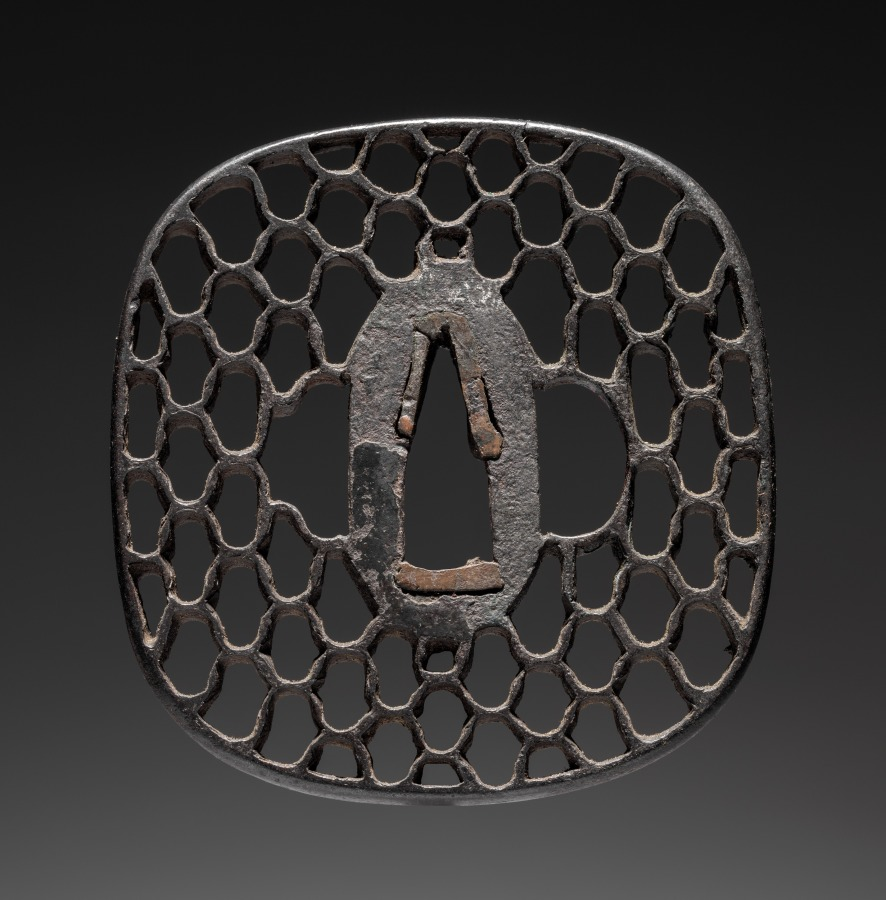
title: Sword Guard (Tsuba)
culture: Japan, possibly Edo period (1615-1868)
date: c. 1615–1868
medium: iron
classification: Arms and Armor